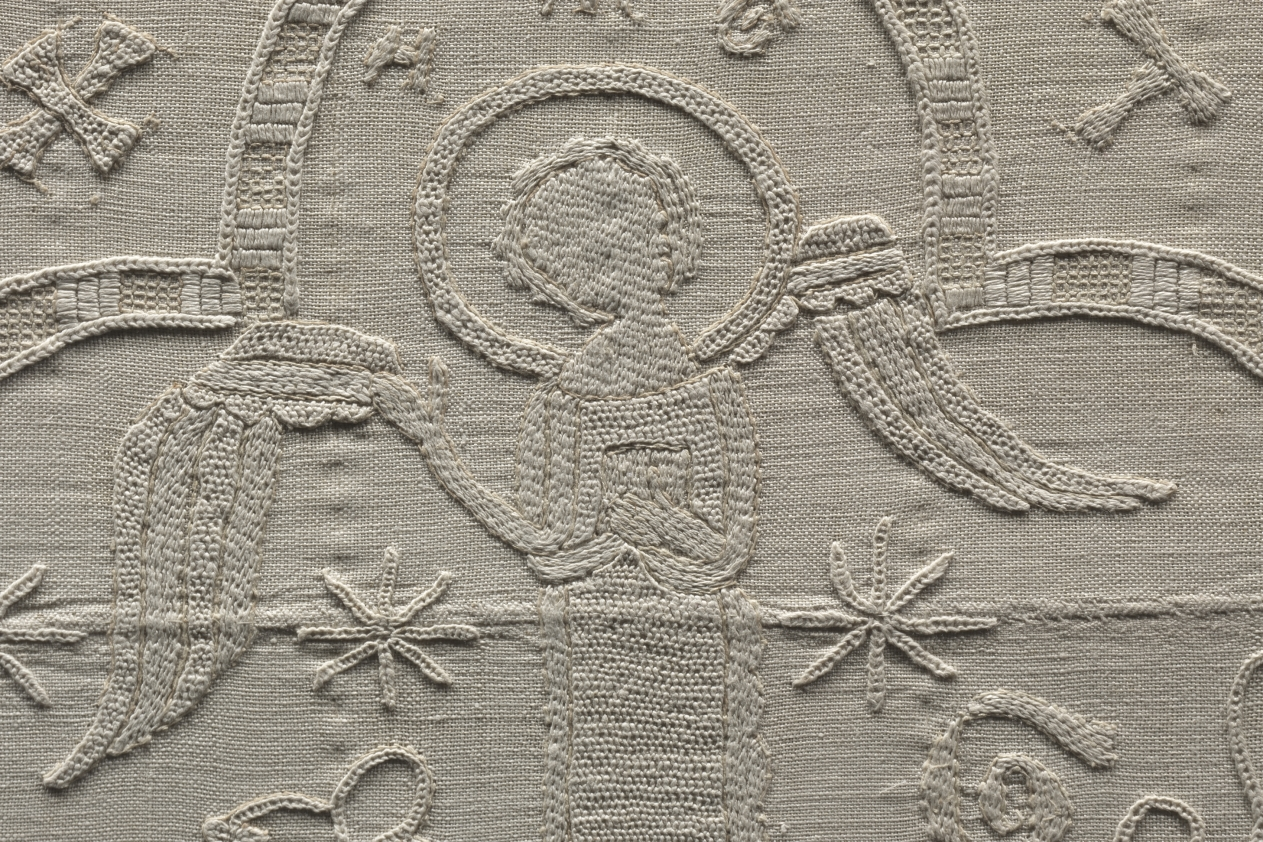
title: Altar Cloth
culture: Germany, Altenberg on the Lahn, Premonstratensian Convent, 14th century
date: c. 1350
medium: embroidery: linen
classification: Embroidery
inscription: various motifs enclosed in quatrefoils with identifying inscriptions in Gothic letters.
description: This large, embroidered altar cloth is one of the rarest, most important medieval church furnishings in existence. It was stitched by nuns in the Premonstratensian Convent in Altenberg on the Lahn River, north of Frankfurt, Germany, and was used to cover the church’s high altar in the weeks leading up to Easter. The cloth is an example of linen embroidery, a specialty of German nuns in the later Middle Ages. The Altenberg monastery church once had valuable furnishings; the high altar retable (a decorated frame with sculptures and paintings on the top of an altar) has survived, the main parts of which are now in the Städel Museum in Frankfurt, Germany.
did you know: When lit from behind, the previously hidden details emerge and the complex design becomes evident.